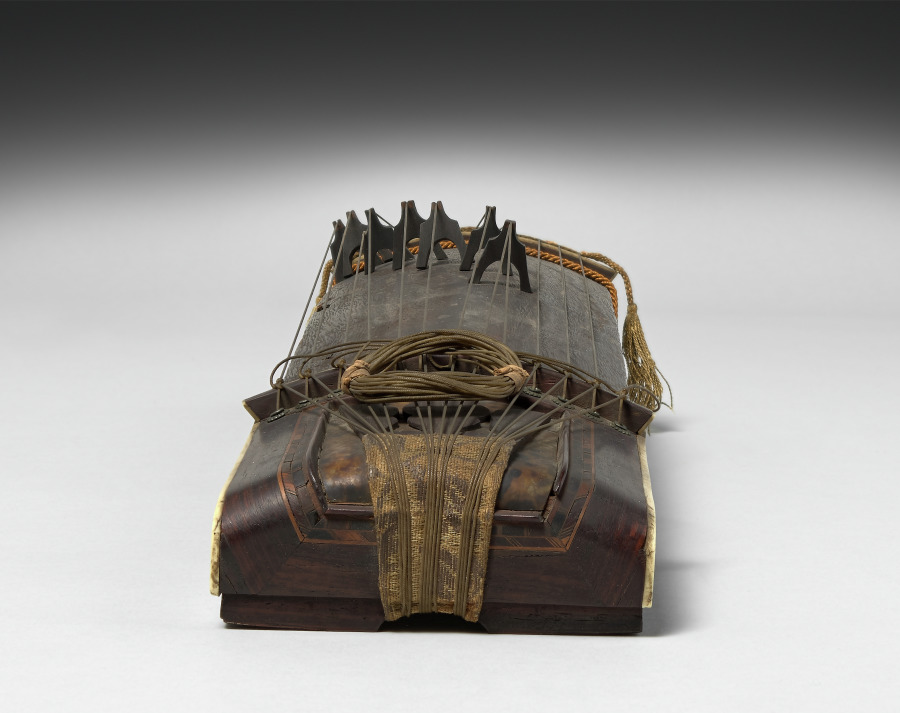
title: Koto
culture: Japan, Edo period (1615–1868)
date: early to mid-1800s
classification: Musical Instrument